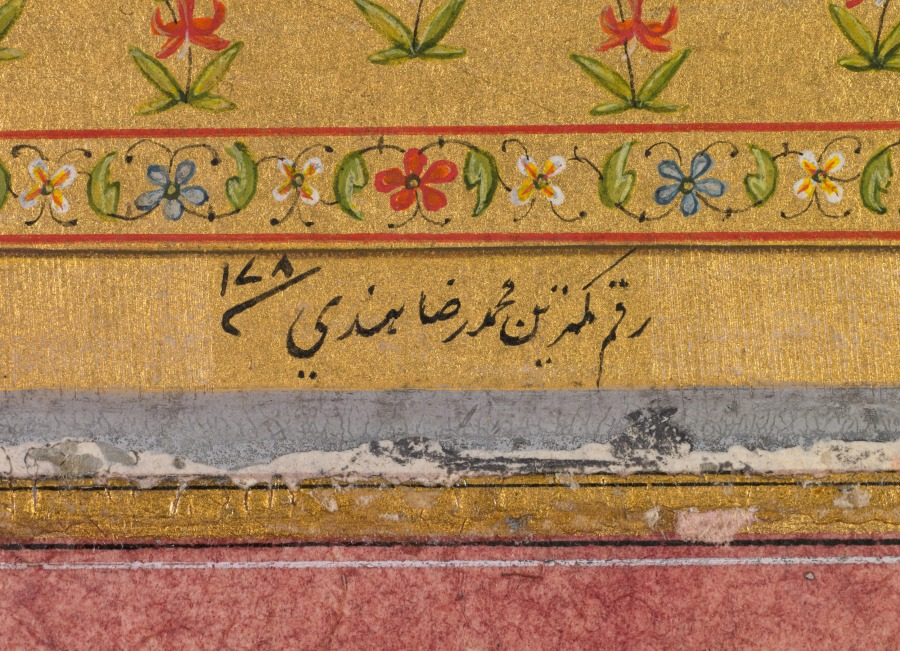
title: Posthumous portrait of the Mughal emperor Muhammad Shah (reigned 1719–1748) holding a falcon (recto)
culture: Mughal India, probably Uttar Pradesh, Lucknow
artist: Muhammad Rizavi Hindi (Indian, active mid-1700s)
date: 1764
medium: Gum tempera, ink, and gold on paper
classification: Painting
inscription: raqam-i kamtarin Muhammad Reza-i Hindi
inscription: tasvir Muhammad Shah Padshah Ghazi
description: The artist used the carpet, the floor cushion, and the halo to indicate the royal status of the seated figure. He has turned the picture plane into the space of a window, over the sill of which a golden carpet ornamented with a field of lilies marks his location for outsiders. His signature in Persian, the Mughal lingua franca, interrupts the fringed border. Painted after the emperor’s death and the dissolution of much of the Mughal court, this refined portrait pays tribute to the wealth and power of the imperial past.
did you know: The archer’s thumb ring is for drawing the bowstring. Perhaps he was left-handed.